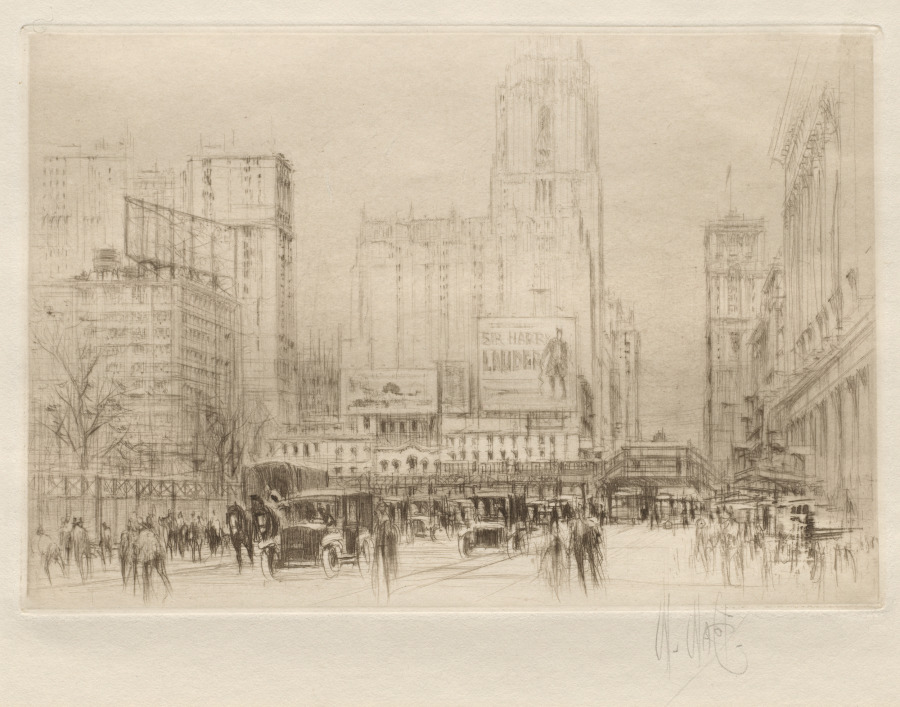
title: Forty-second Street NY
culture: England, 20th century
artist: William Walcot (British, 1874–1943)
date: 1923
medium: etching in brown and aquatint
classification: Print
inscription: Lower right, in graphite: W. Walcott